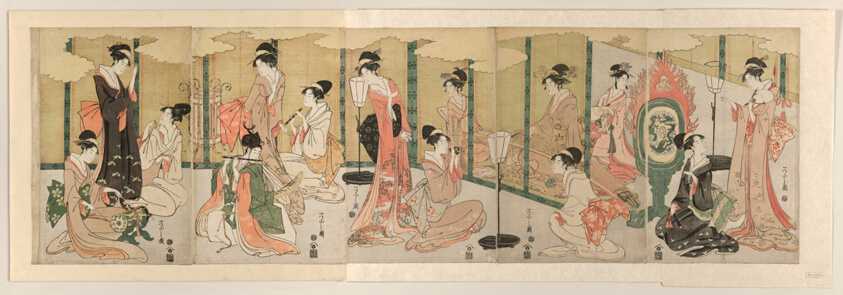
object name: Print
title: Parody of The Book of Joruri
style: Japanese (culture or style)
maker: Chobunsai Eishi; Japanese, 1756-1829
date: c. 1789/1801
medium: Color woodblock print; oban pentaptych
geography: Japan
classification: woodblock print; print; asian art